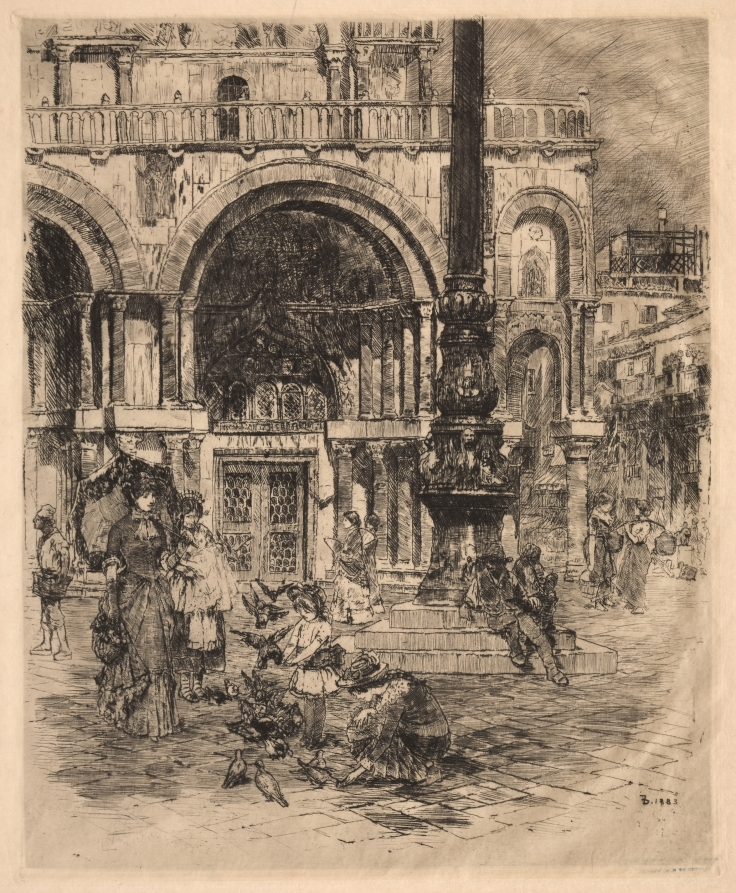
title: Piazza San Marco, Venice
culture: America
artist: Frank Duveneck (American, 1848–1919)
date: 1883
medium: etching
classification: Print